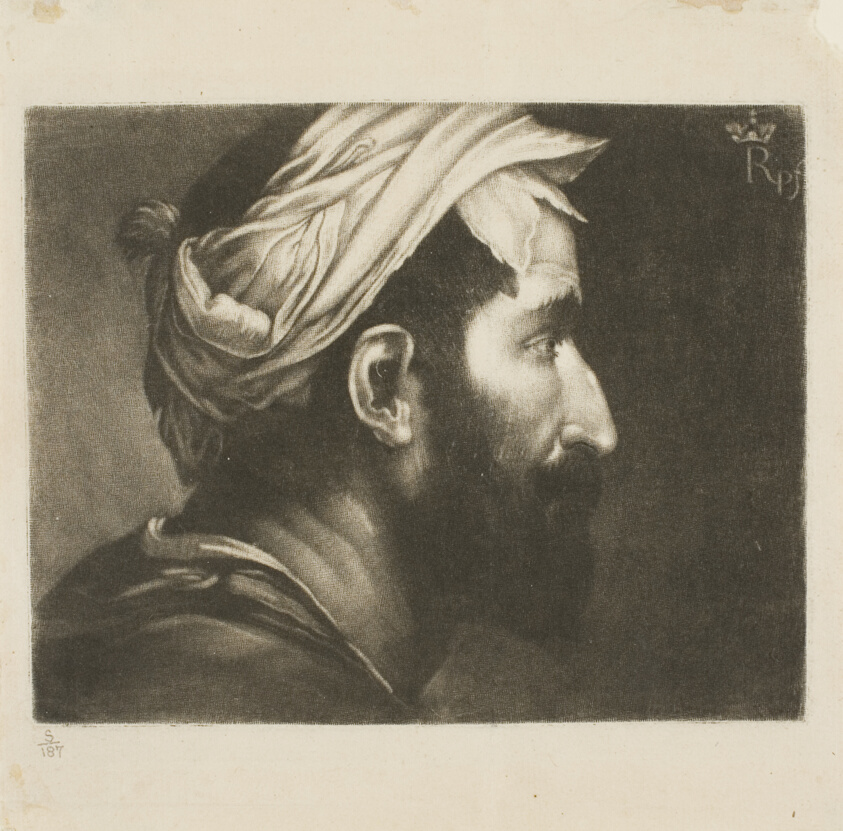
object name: Print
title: Head of Executioner, from John Evelyn's Sculptura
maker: Richard Houston; Irish, about 1721–1775; After Prince Rupert of the Rhine; German, 1619-1682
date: 1755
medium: Mezzotint in black on ivory laid paper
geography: Ireland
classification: mezzotint; print; prints and drawing